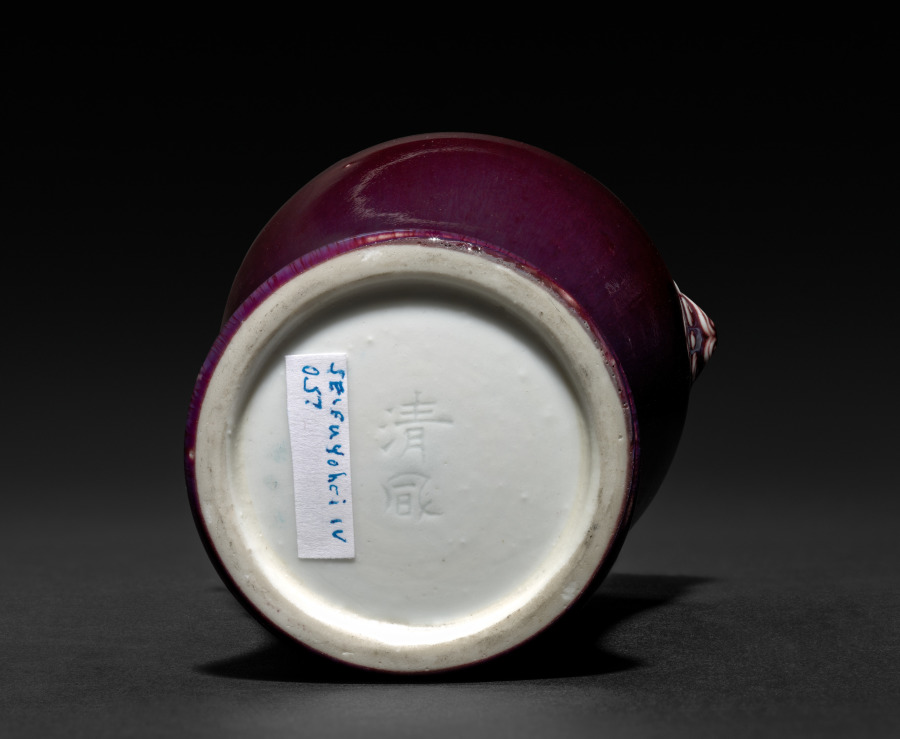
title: Single Stem Vase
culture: Japan, Taishō period (1912–26)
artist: Seifū Yohei IV (Japanese, 1872–1951)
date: 1914–46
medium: Porcelain with molded design and copper-red glaze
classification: Ceramic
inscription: 清風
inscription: 清風造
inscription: 成山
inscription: 清風盧人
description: This vase is copper red in color at the top and becomes purple closer to the bottom, not unlike a Chinese transformation or flambé glaze with mottling and dripping of the glaze. The lip of the vase and much of the lion-head designs remain white. On the box lid, the color of the glaze is called shinsha, which is often glossed as copper red or oxblood, or sometimes cinnabar. Here, it is meant to refer to a Qing-dynasty glazing technique developed in an effort to reproduce a red glaze used during the reign of the Xuande emperor (1426–35) of the Ming dynasty.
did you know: This vase has lion heads for “ears."